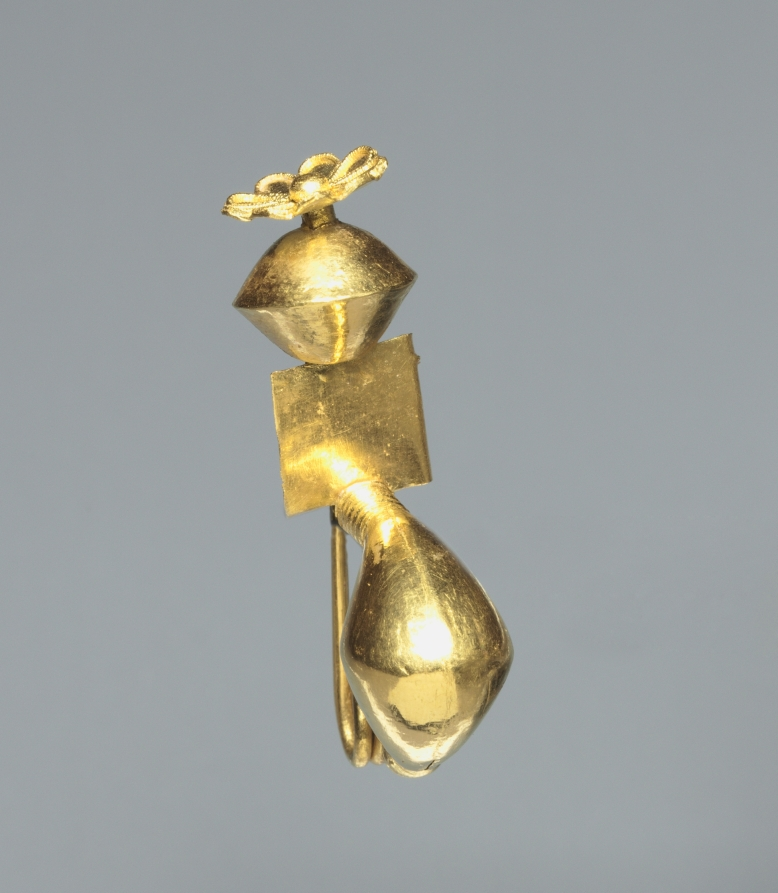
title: Fibula (Pin)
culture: South Italy, Campania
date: 400–200 BCE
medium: gold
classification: Jewelry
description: This extravagant fibula, likely used to fasten garments, is decorated with gold rosettes and vines. An enormous leech-shaped bow and pin form the body of the fibula. A band of rosettes adorns the center of the bow. Above the bow, a gold plaque is adorned with an eight-petaled flower and palmette filigree. A gold bead, perhaps representing a pomegranate, tops the plaque. The bead is crowned with oblong petals and sprouting leaves.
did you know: This fibula’s elaborate surface includes soldered gold wire and granulated spheres.